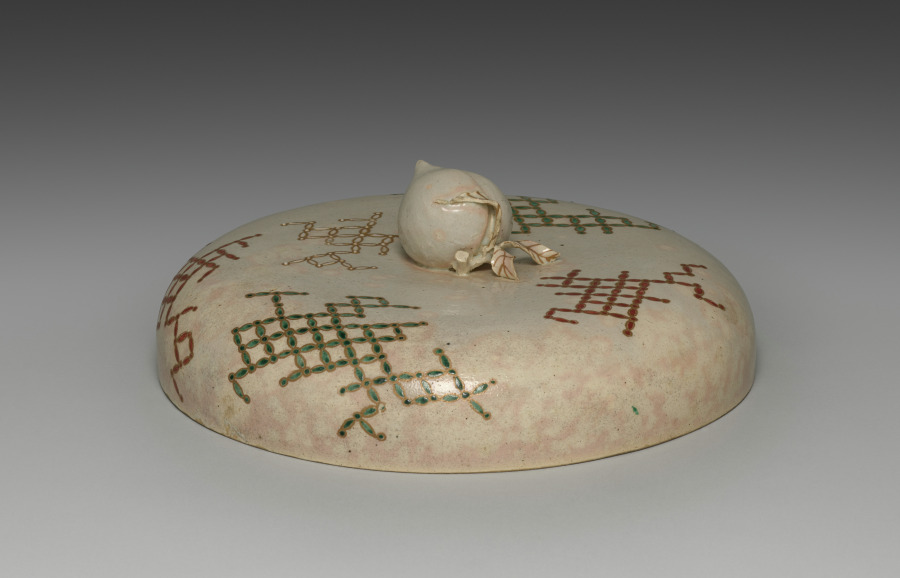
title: Cover for a Bowl with Seven Treasures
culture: Japan, Edo period (1615–1868)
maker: Seifū Yohei II (Japanese, 1844–1878)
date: 1861–78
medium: Stoneware with overglaze color enamel and gold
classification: Ceramic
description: While porcelain was their primary specialization, all the members of the Seifū studio also made stoneware painted with iron oxide designs under the glaze and with color enamel and gold over the glaze. Many examples are further characterized by pink dots brought out during firing and by crackling in the glaze. Works of this type are classified as Kyoto ware, after the city where the style developed. People used the ceramics for a diversity of purposes, from everyday dining to chanoyu, or Japanese tea practice.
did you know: At the center of the lid is a knob in the shape of a peach with a stem and leaves.